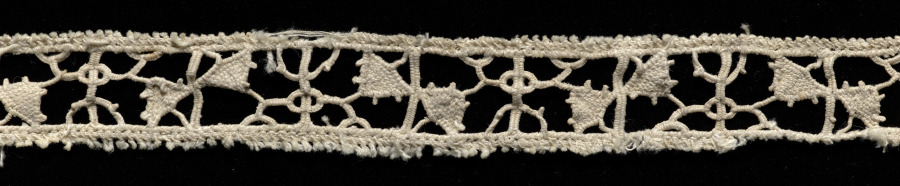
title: Lace Fragment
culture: Italy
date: 1500s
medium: Linen: needle lace (reticella) insertion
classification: Lace